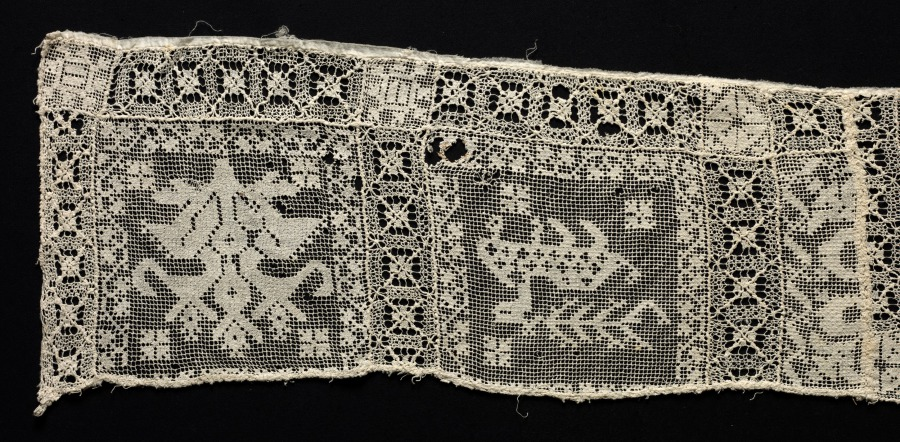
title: Band with Various Fantastic Creatures and Vegetal Patterns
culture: Italy, 1800s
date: 1800s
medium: Bleached linen (est.): needle lace, filet/lacis (knotted ground and darned in two directions)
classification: Lace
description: The reversed and backward orientation of many of the squares in this band of lace suggests that this was not their original layout. They were most likely taken apart and later joined back together in a disoriented manner.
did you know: The square showing a man in midair above a bull-like creature is reminiscent of the Minoan "Bull Leaping" fresco at the Knossos palace complex.